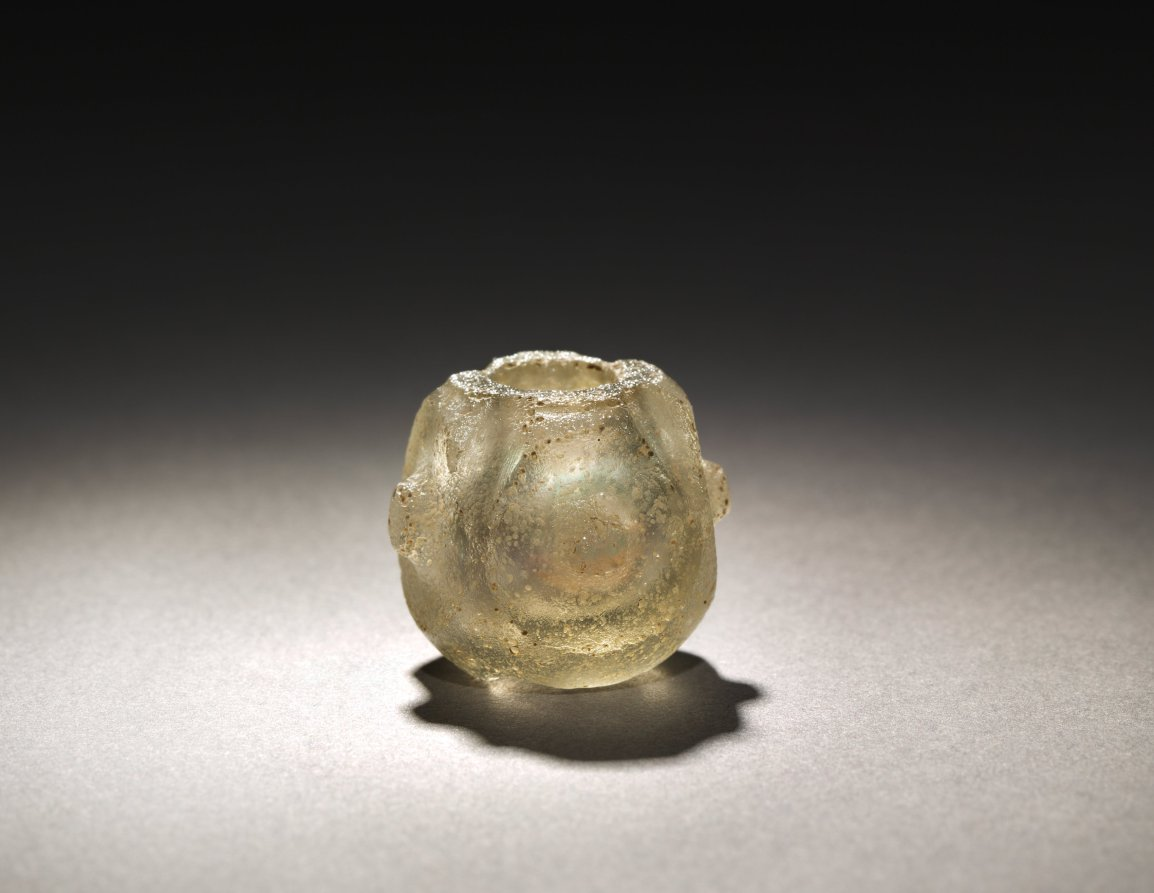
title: Miniature Reliquary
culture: Afghanistan, probably Begram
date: c. 1–200 CE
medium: glass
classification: Glass